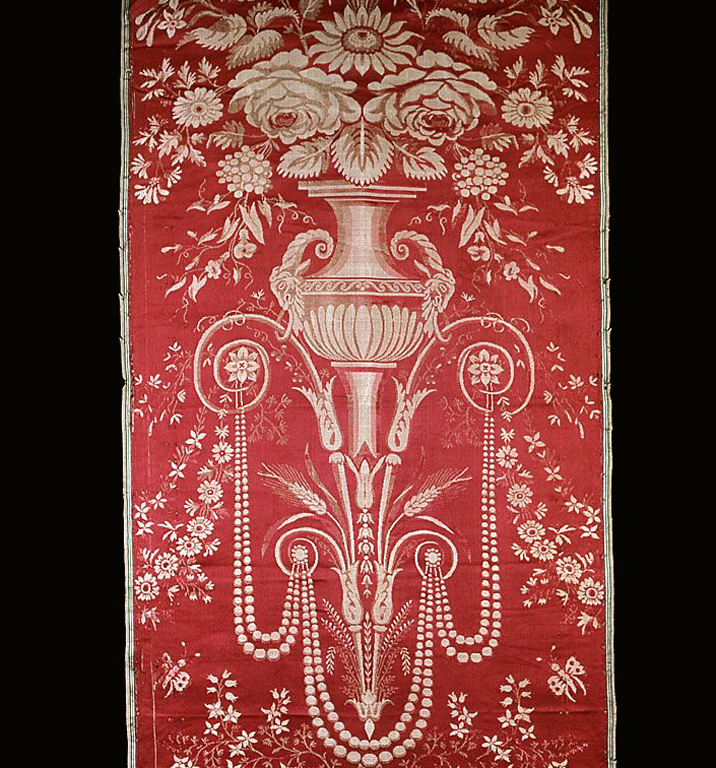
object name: Textile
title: Panel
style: empire, european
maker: France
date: Empire period, c. 1820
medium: Silk, satin weave with plain and twill interlacings of secondary binding warps and complementary ground wefts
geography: France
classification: textile; weaving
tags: birds, animals, flowers, swags, urns